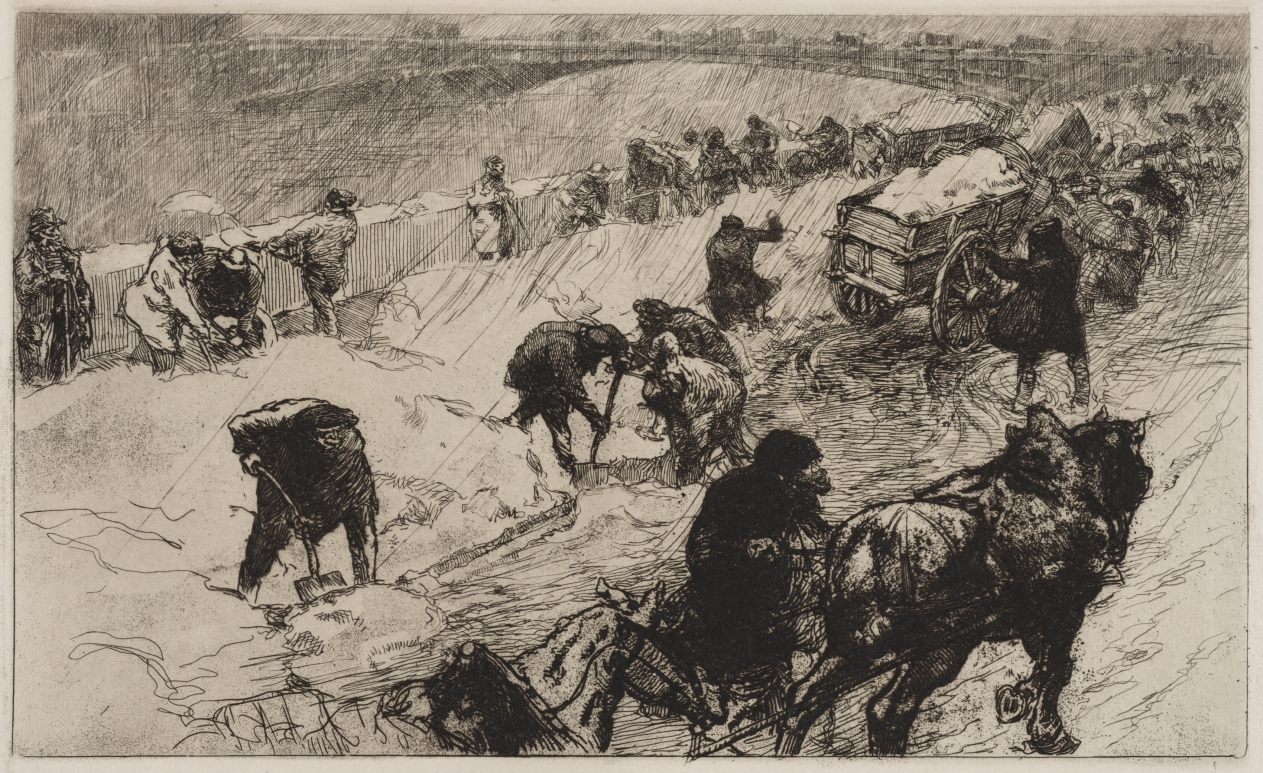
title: Snowball Fight: Quai aux Fleurs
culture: France, 19th century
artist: Auguste Louis Lepère (French, 1849–1918)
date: 1890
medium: etching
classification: Print